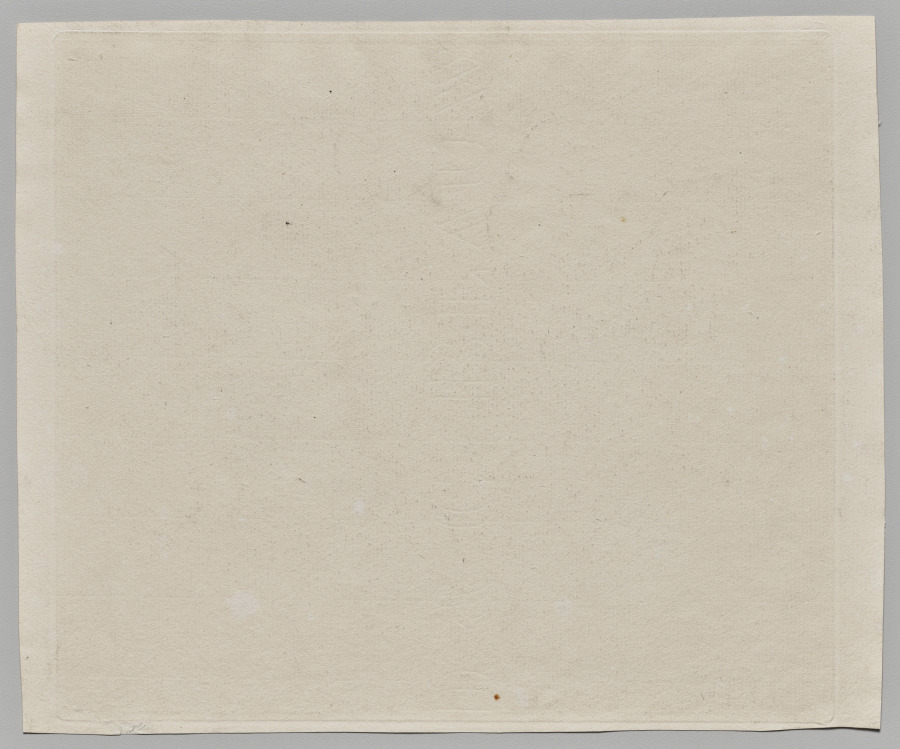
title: Untitled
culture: France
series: L'Assommoir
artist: Gaston de Latouche (French, 1854–1913)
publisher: Cadart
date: 1879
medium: drypoint on laid paper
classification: Print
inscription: Signed, in plate, at lower left: Gaston La Touche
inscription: Watermark: D.C. BLAUW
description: Although his work changed throughout his career, early on Gaston de Latouche belonged loosely to the Impressionist circle through his association with Édouard Manet. Latouche explored subjects—such as that seen here—taken from the lives of working-class Parisians. This print represents a scene from naturalist author Émile Zola’s novel L’Assommoir, which detailed the rise and fall of a laundress named Gervaise. Latouche is said to have collaborated with the author on the imagery and exhibited the entire series at the public Paris Salon in 1879.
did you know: Gaston de LaTouche completely changed the subjects and style of his work around 1890 and destroyed much of his early work.